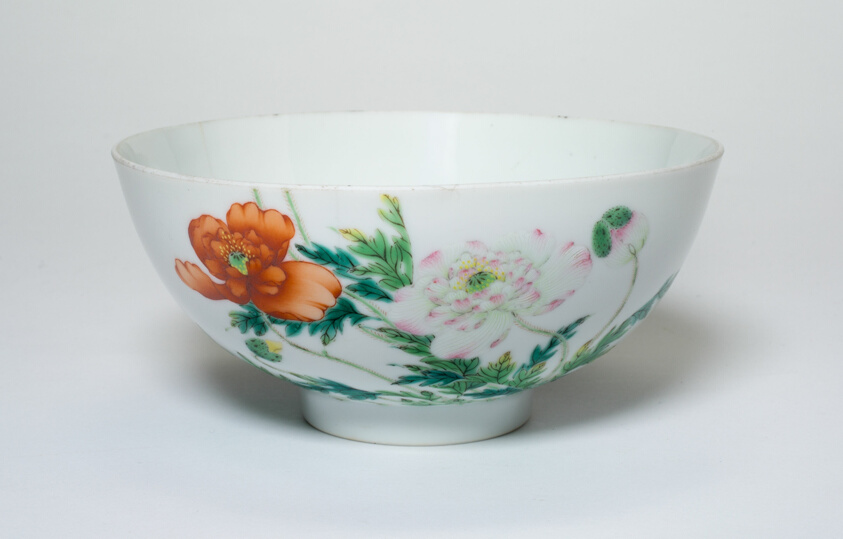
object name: Vessel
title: Bowl with Peony Flowers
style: Chinese (culture or style)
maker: China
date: Qing dynasty (1644–1911), Yongzheng reign mark and period (1723–1735)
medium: Porcelain painted in overglaze enamels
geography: China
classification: bowl; porcelain; dish (vessel); asian art; ceramics; vessel